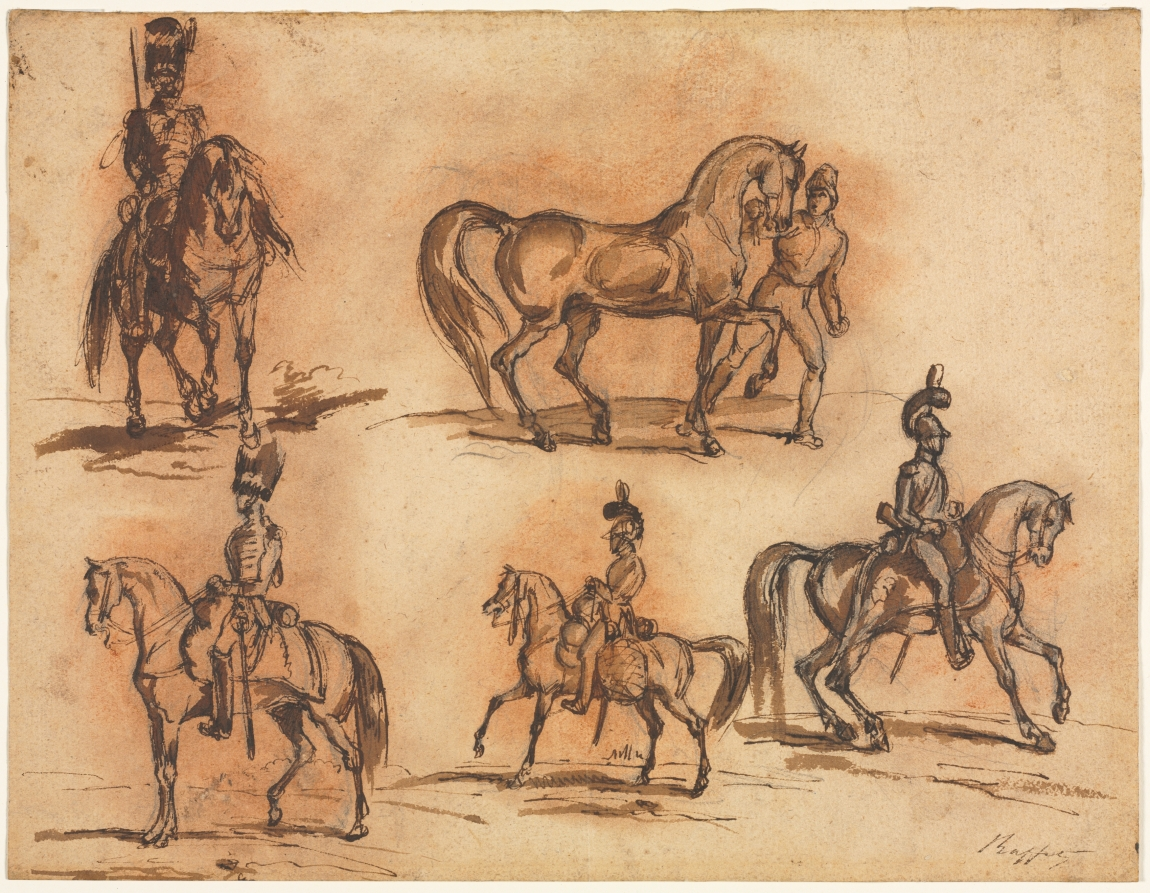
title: Five Equestrian Studies: Cavalrymen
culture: France, 19th century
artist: Auguste Raffet (French, 1804–1860)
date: mid 19th century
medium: pen and brown ink and brush and brown wash over graphite, with red chalk wash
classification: Drawing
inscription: signed, lower right, in brown ink: Raffet ; VERSO, center right, in graphite: Lot 401 [underlined] / Hotel Drouot / Vente Chardey / 14-17 Mai /77 [slash part of inscription] [sideways]